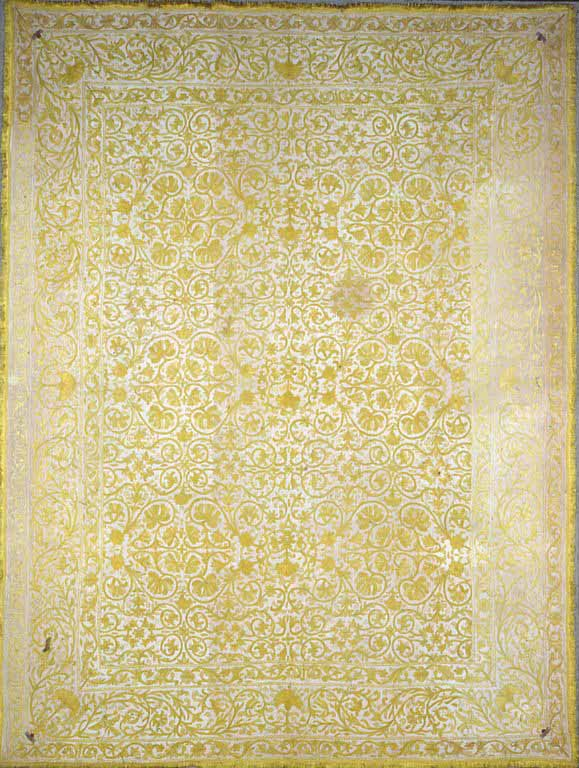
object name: Textile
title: Bedcover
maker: Indo-Portuguese (Portugal)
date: Late 17th century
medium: Linen, plain weave embroidered in silk floss in chaing, short, long and brick stitches; original silk fringe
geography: Portugal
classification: textile; weaving; needlework (visual works)